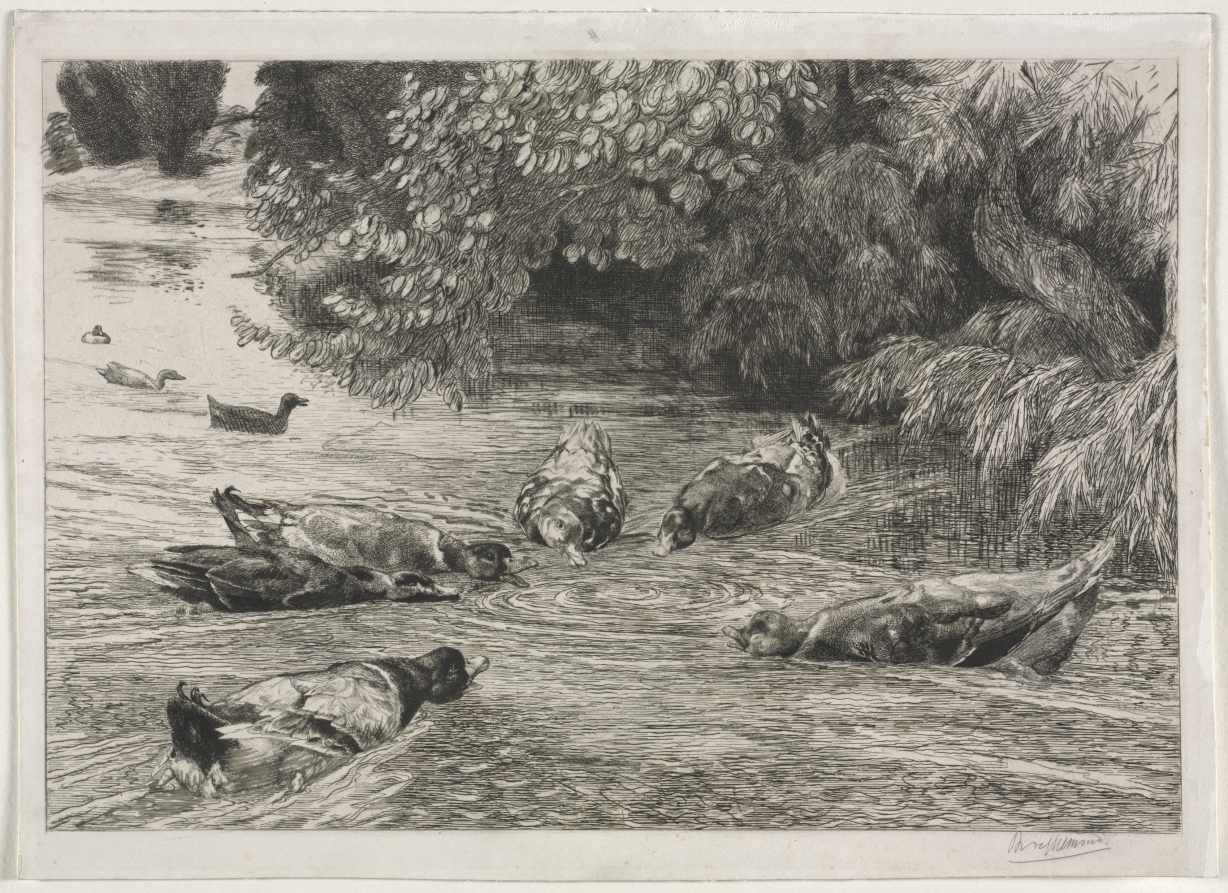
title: The Question Mark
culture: France, 19th century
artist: Félix Bracquemond (French, 1833–1914)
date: c. 1865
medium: etching, hand colored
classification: Print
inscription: signed, lower right, in graphite: Bracquemond